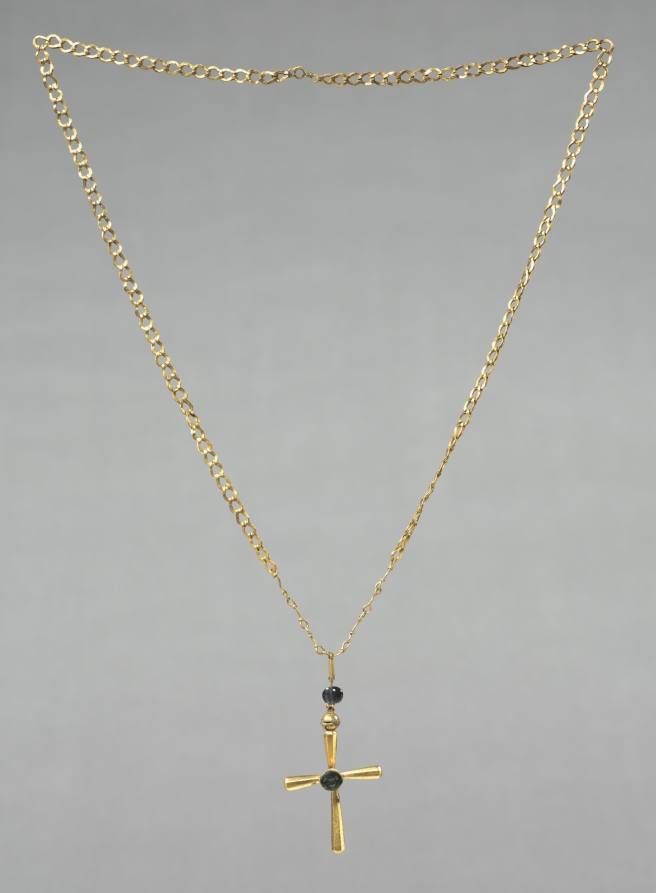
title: Chain with Pendant Cross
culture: Byzantium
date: 500s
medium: gold, sapphire, and glass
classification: Jewelry